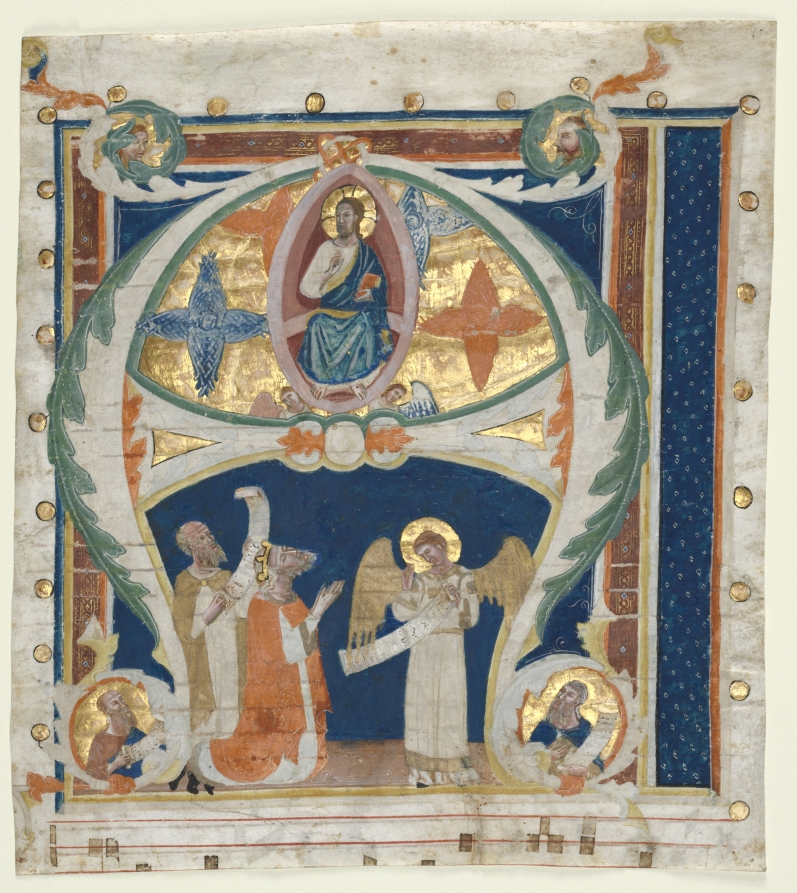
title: Historiated Initial (A) Excised from a Gradual: Christ in Majesty with King David and Prophets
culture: Italy, Florence (?)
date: c. 1300–1340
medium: ink, tempera, and gold on parchment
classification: Manuscript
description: This initial A probably refers to one of the most famous responses in Latin sung on the first Advent Sunday before Christmas: Aspiciens a longe et ecce video Dei potentiam venientem (I look from afar, and behold I see the power of God coming). With this song the physical presence of Christ in the world was celebrated. The leaf is probably taken from an antiphonary, a large liturgical book used by the choir for chanting. The style is reminiscent of Italian art during the 1200s and can be dated to the time before the Black Death.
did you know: Directly below the decorated initial is a line of music; the black squares are music notes sitting on a staff. During the Middle Ages the staff had only four lines, unlike today.